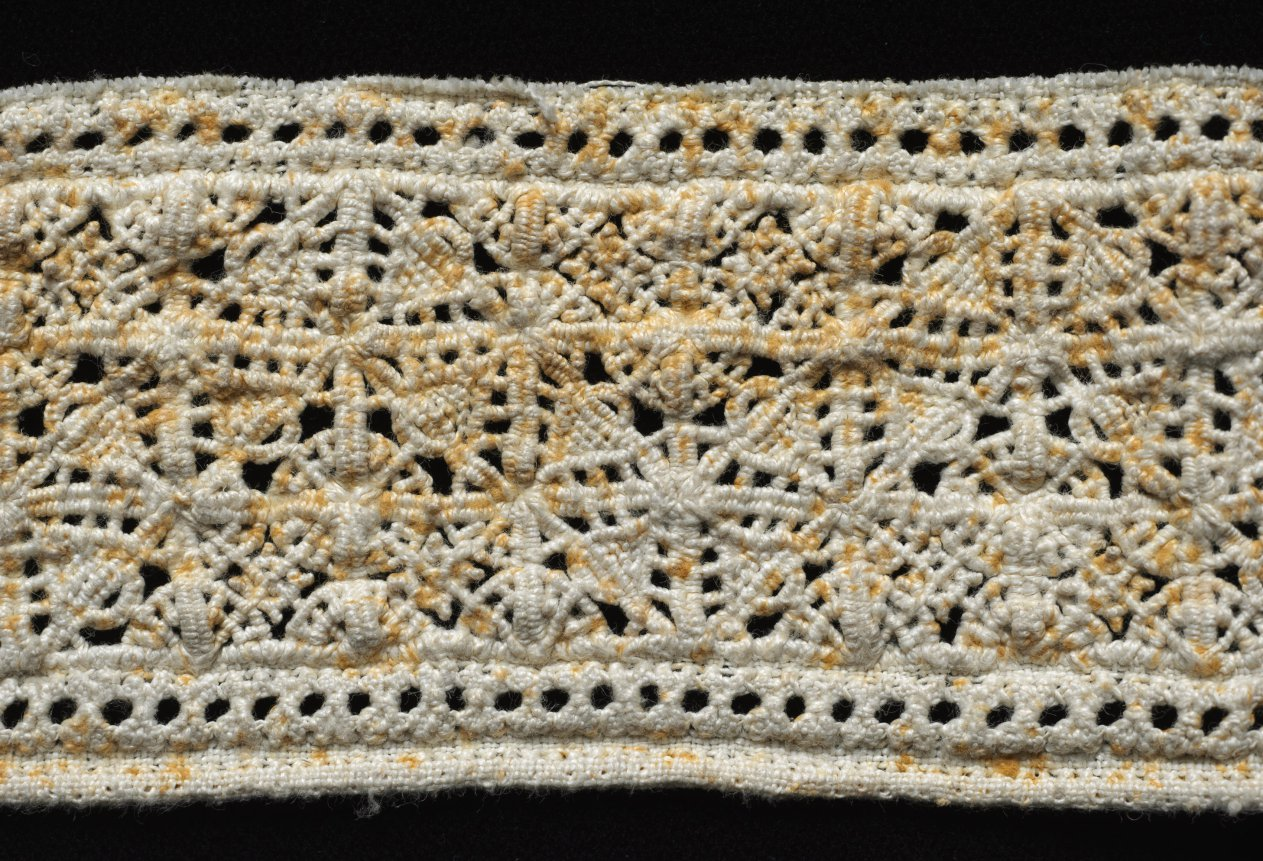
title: Lace Fragment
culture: Italy, Venice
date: 1500s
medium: Linen: needle lace, reticella insertion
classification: Lace